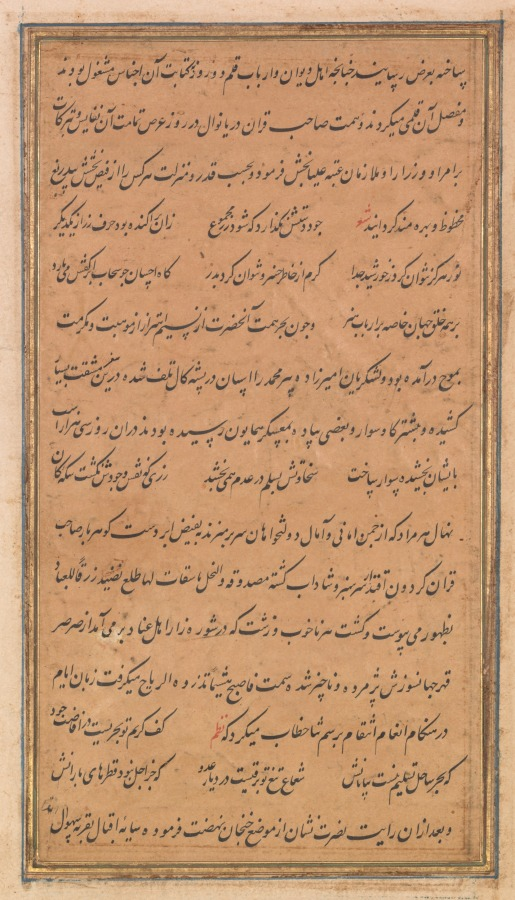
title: Timur distributes gifts from his grandson, the Prince of Multan, from a Zafar-nama (Book of Victories)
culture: Mughal India, court of Akbar (reigned 1556–1605)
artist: Shravana (Indian, active 1550s–c.1600)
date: 1598–1600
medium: Gum tempera, ink, and gold on paper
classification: Painting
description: The Turkic conqueror Timur (1336–1405) is the Mughal emperor Akbar’s most celebrated paternal ancestor. He sits on a terrace, shaded by a crimson awning. The blue carpet with gold border marking his high status is covered with a floral vine pattern that became fashionable in the 1500s. This scene takes place in a territory governed by Timur’s grandson, who sent him gifts of horses, camels, and a variety of luxury items. Timur is in the process of regifting them to members of his entourage in accordance with their merits.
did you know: Pre-modern giftwrap: Round textiles cover presentation platters.